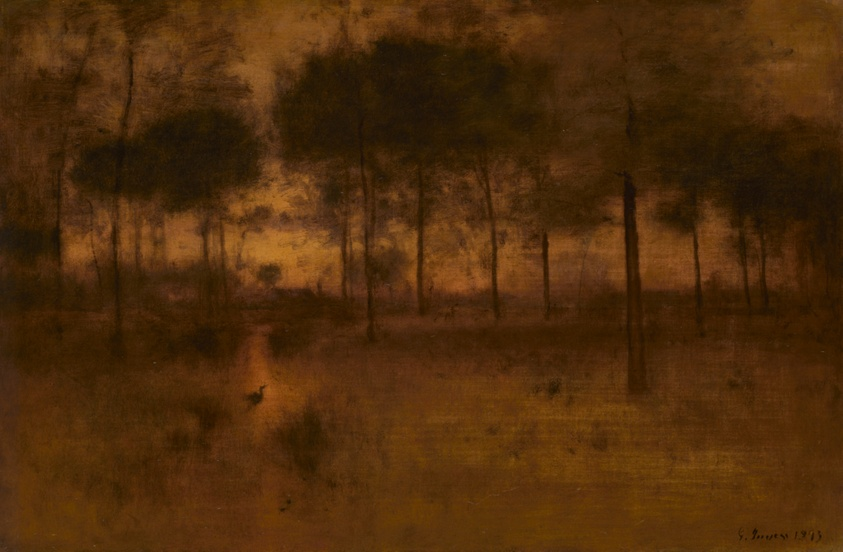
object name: Painting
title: The Home of the Heron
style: Post-Impressionism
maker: George Inness (American, 1825–1894)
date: 1893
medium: Oil on canvas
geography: Florida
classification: painting; american arts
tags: landscapes, birds, weather/seasons, circles, animals